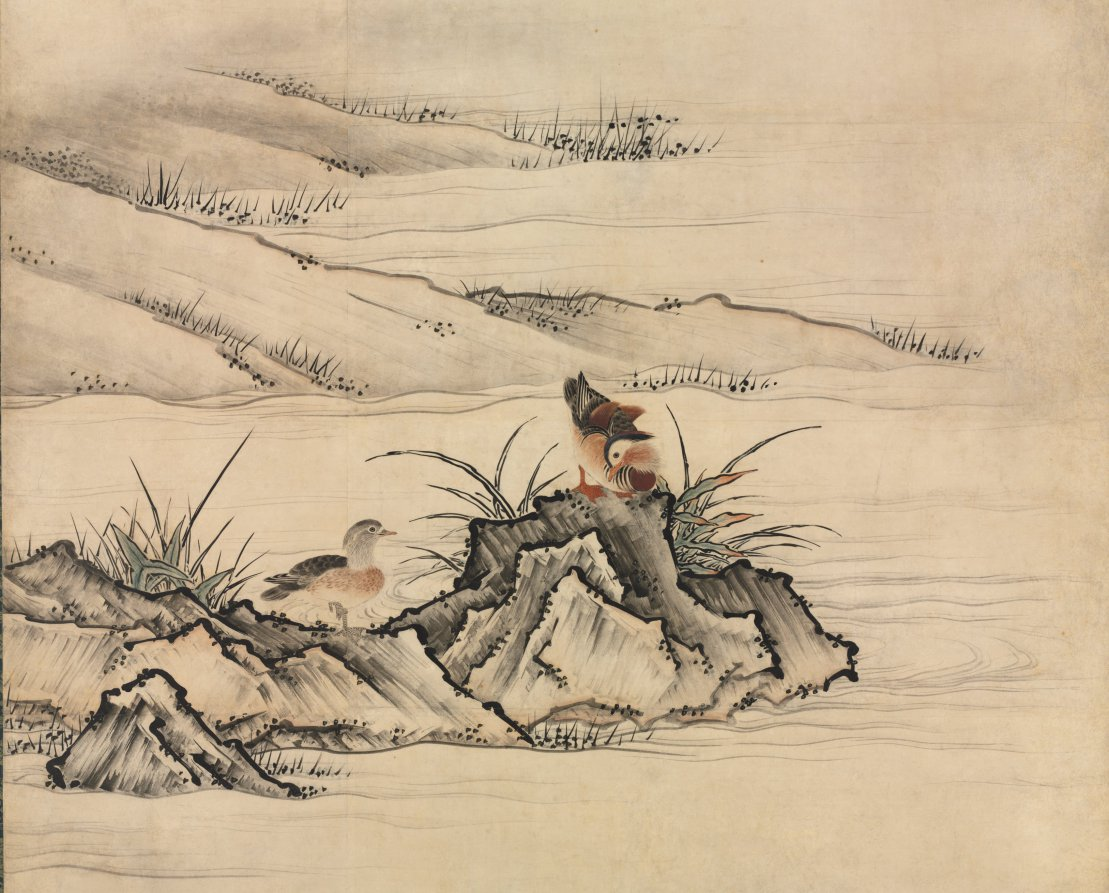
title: Flowers and Birds in a Spring Landscape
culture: Japan, Muromachi period (1392–1573)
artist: attributed to Kano Motonobu (Japanese, c. 1476–1559)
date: 1500s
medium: One of a set of sliding door panels mounted as hanging scrolls; ink and color on paper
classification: Painting